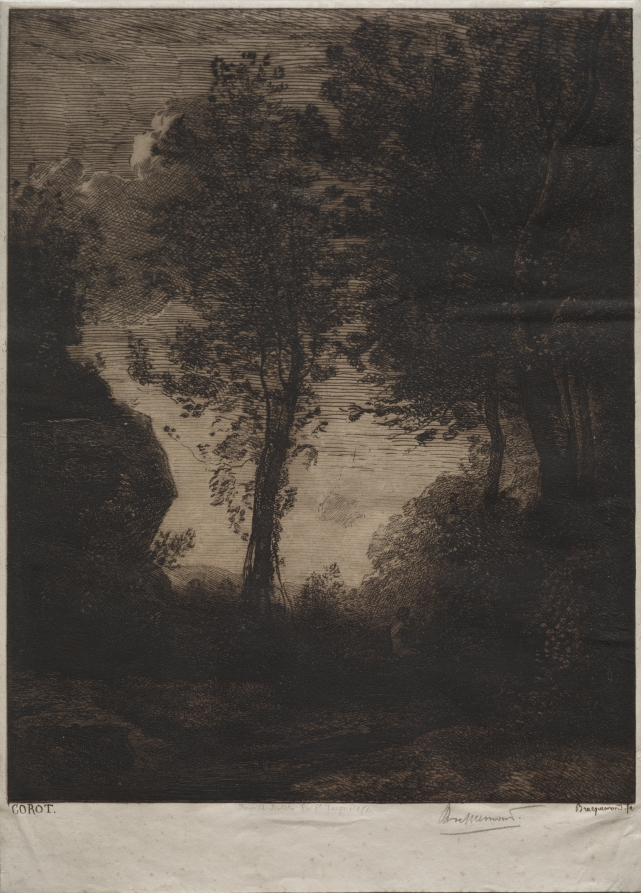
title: Landscape: Sunset, after Corot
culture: France, 19th century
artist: Félix Bracquemond (French, 1833–1914)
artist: after Jean Baptiste Camille Corot (French, 1796–1875)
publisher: August Delâtre (French, 1822–1907)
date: c. 1858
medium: etching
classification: Print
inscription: signed lower right, in graphite: Bracquemond; lower left, in plate: COROT; lower center, in plate: Imp a Delâtre Rue St. Jacques 171; lower right, in plate: Bracquemond fc.